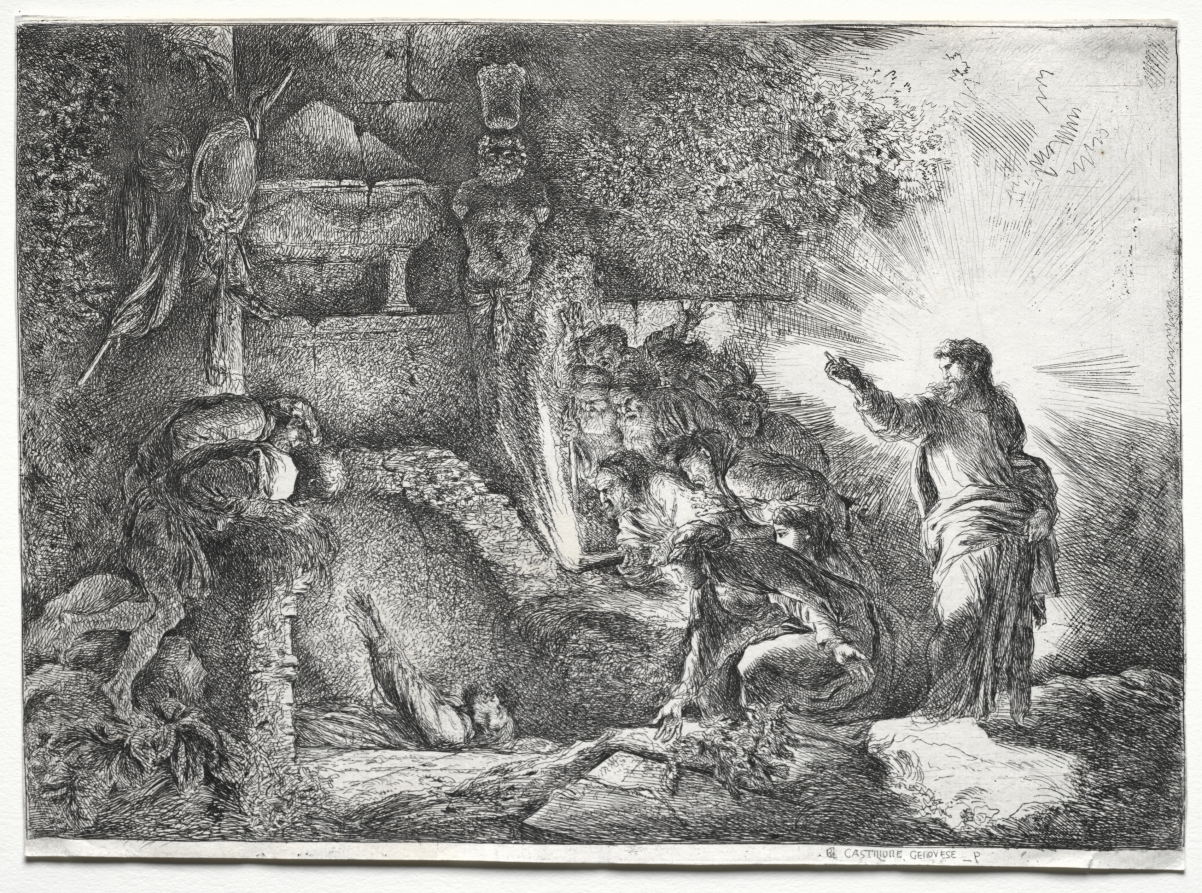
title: The Resurrection of Lazarus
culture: Italy, 17th century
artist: Giovanni Benedetto Castiglione (Italian, 1609–1664)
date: 1645–50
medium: etching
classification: Print